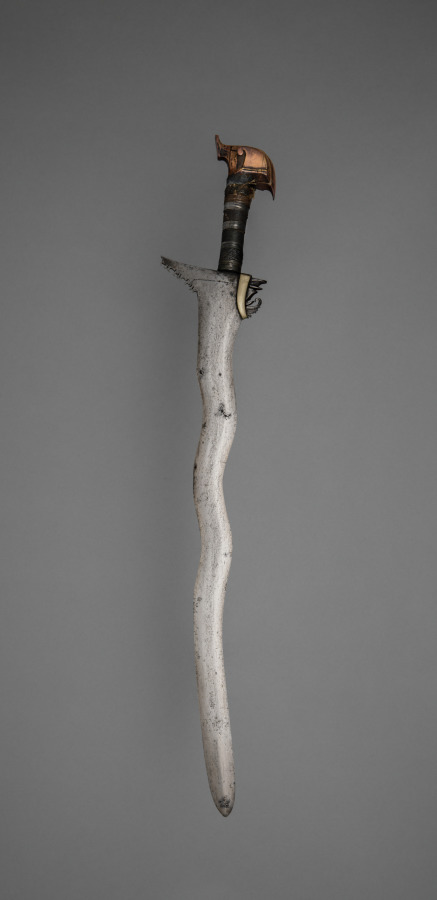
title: Sword (Kris)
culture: Philippines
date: before 1918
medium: Blade: metal; handle: metal with silver and braided twine; pommel: ivory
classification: Arms and Armor